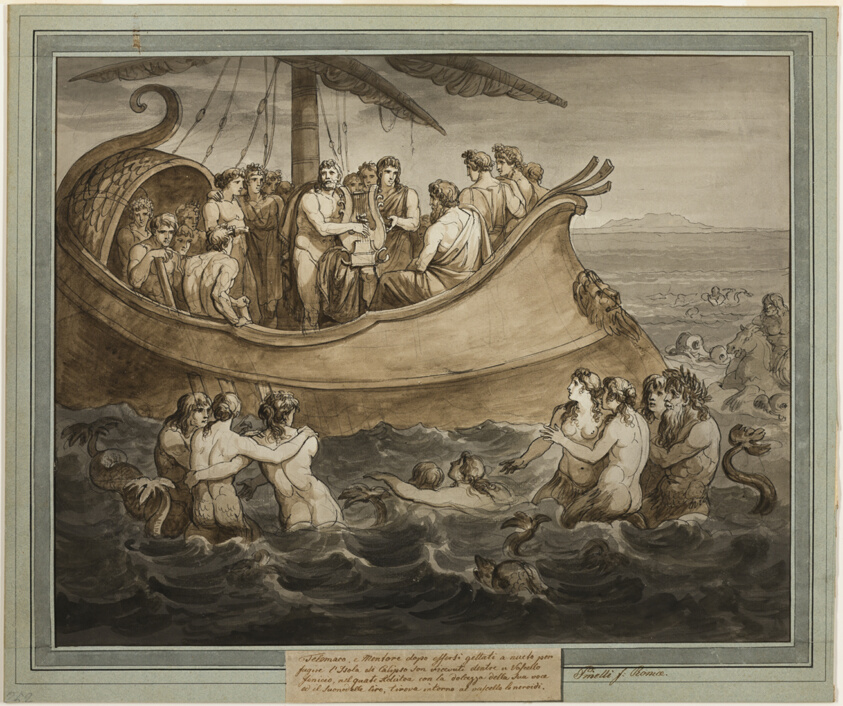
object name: Drawing and Watercolor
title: Telemachus and Mentor in a Galley after Fleeing the Island of Calypso, from The Adventures of Telemachus, Book 8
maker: Bartolomeo Pinelli (Italian, 1781-1835)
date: 1808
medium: Pen and black ink, with brush and gray and brown wash, over black chalk on ivory laid paper, laid down on board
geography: Italy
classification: drawings (visual works); prints and drawing